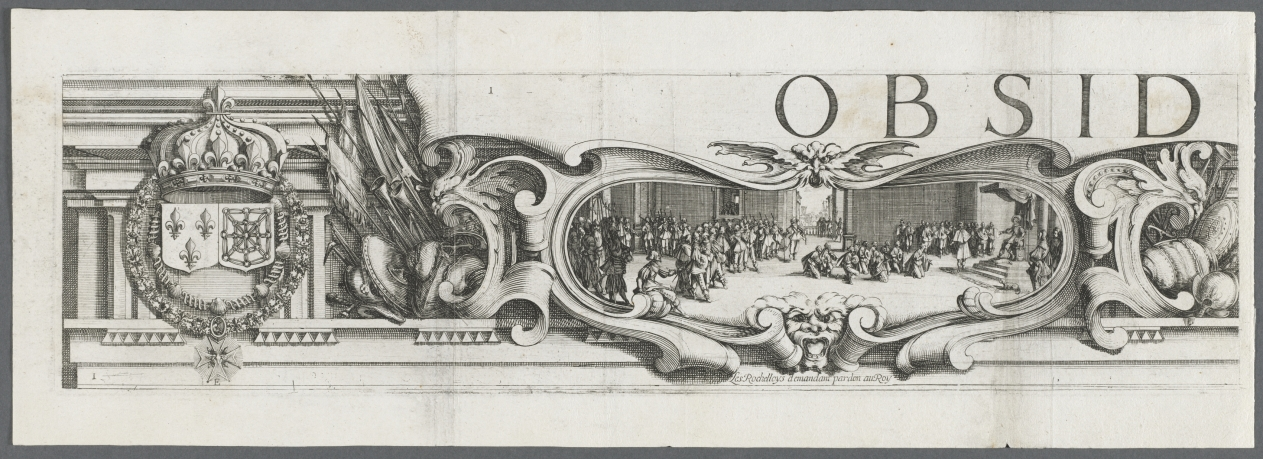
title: The Siege of La Rochelle: Plate 1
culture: France, 17th century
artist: Jacques Callot (French, 1592–1635)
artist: and Abraham Bosse (French, 1602–1676)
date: 1628–1630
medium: etching and engraving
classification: Print